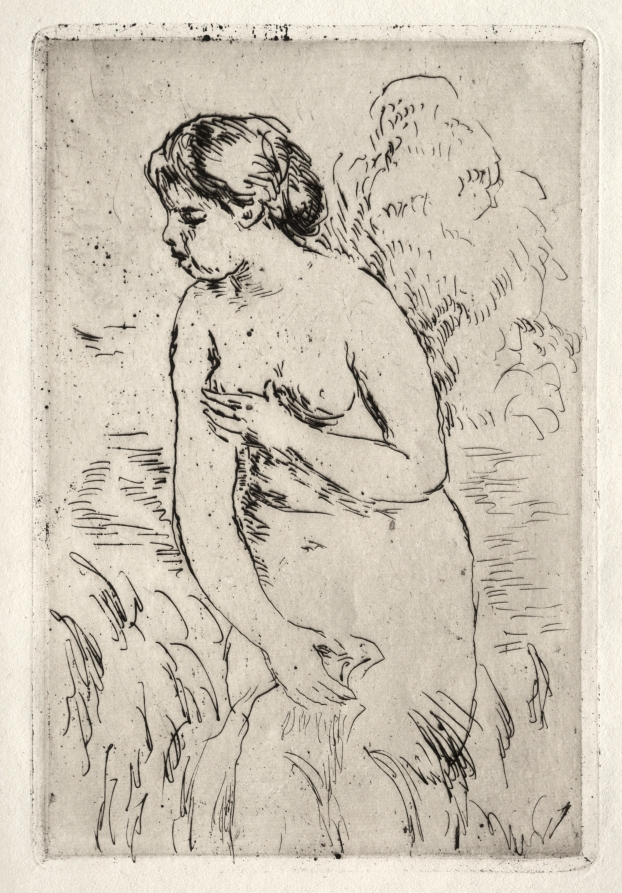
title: Bather Standing Up to Her Knees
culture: France, late 19th-early 20th century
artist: Pierre-Auguste Renoir (French, 1841–1919)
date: 1910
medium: etching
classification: Print